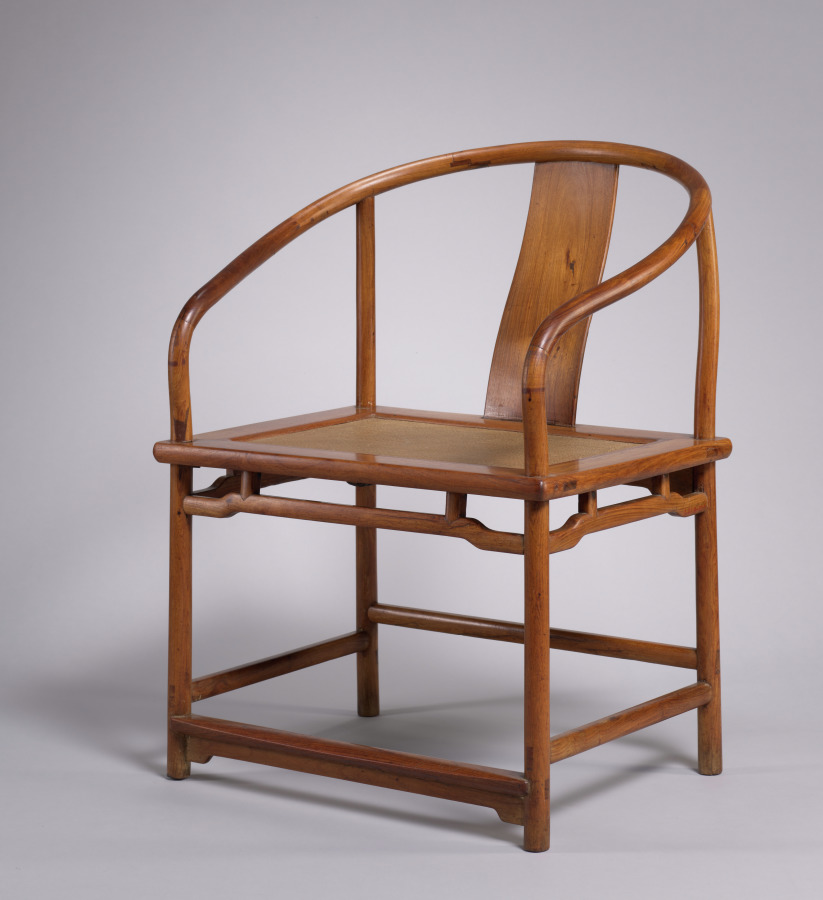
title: Roundback Armchair: Lohan Type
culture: China, Ming dynasty (1368–1644) to Qing dynasty (1644–1911)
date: 1600s–1700s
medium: Rosewood (huanghuali)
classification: Furniture and woodwork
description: In history, China moved from an original floor culture to high chairs and tables, developing a unique tradition of craftsmanship. Although still relatively unexplored, the manufacturing and styles of furniture differ by region. This horseshoe-back armchair was made in Jiangsu province. Its simplicity and minimalist elegance is characteristic of Suzhou-style furniture and aesthetics. The back of the chair is made of seven pieces of wood, joined and secured with an inserted wooden pin, a mortise-tenon technique that appeared in its earliest form in Neolitihic fragments of the Hemudu culture.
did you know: The horseshoe-shaped back of this chair is joined without glue or nails.